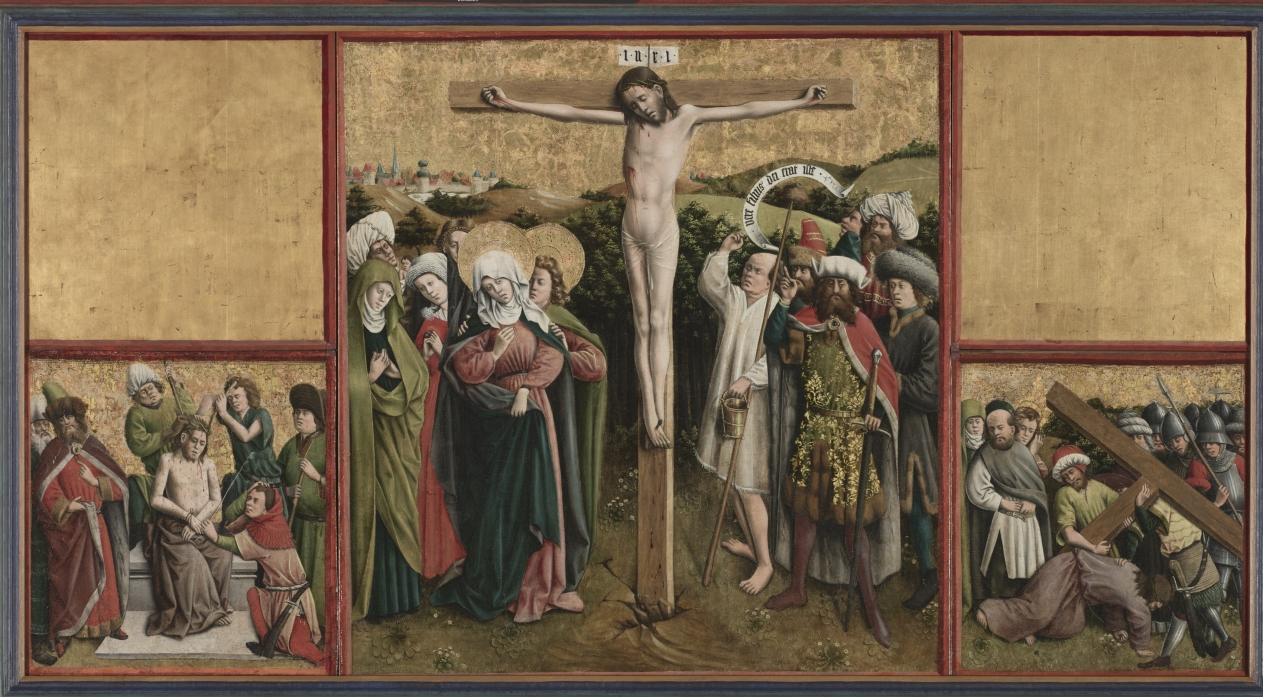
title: Altarpiece with The Passion of Christ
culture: Germany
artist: Master of the Schlägl Altarpiece (German)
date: c. 1440s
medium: oil and gold on wood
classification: Painting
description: The visual focus of this altarpiece is the suffering and death of Christ on the cross. So-called Passion cycles in art include the events leading up to and following the Crucifixion, not only as single subjects but as scenes meant to be read in sequence. Passion cycles were promoted by the two great teaching orders, the Franciscans and the Dominicans, for whom this subject represented the main religious drama of their churches, and also by the German mystics who advocated private contemplation on the humanity and suffering of Christ. The original context for this altarpiece remains unknown, but it was probably made for a religious institution in Westphalia in the Rhine Valley. During the 1870s it was given to the Abbey of Schlägl, near Linz in Upper Austria, from which both altarpiece and artist take their names. The altarpiece is not preserved today in its original format, and some of the individual scenes are missing. Scholars continue to debate the original number of scenes and their sequencing; nine of the original panels have survived.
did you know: In 2012 the museum's conservation department created a new frame that was stylistically more appropriate for this altarpiece.